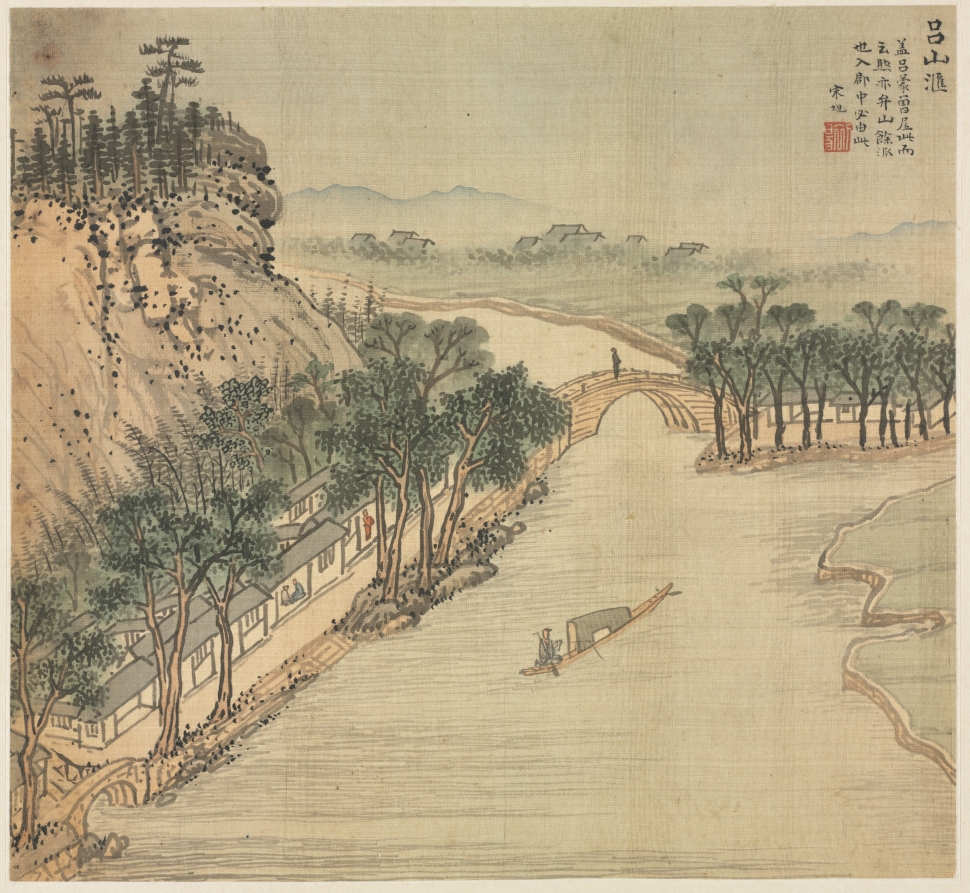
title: Lüshan Hui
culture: China, Jiaxing, Ming dynasty (1368–1644)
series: Eighteen Views of Huzhou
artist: Song Xu (Chinese, 1525-c. 1606)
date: c. 1588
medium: Album leaf; ink and color on silk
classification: Painting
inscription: 呂山滙：蓋呂蒙曾屋此而云然。亦弁山餘派也，入郡中必由此。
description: This album of landscape paintings depicts the famous scenic areas located in and around the city of Wuxing in southeastern China. These places were all known for their natural beauty, but in addition, a number were distinguished by their links to eminent historical figures and events. The artist, Song Xu, was not a native of Wuxing, but must have visited it when he accepted the commission, for he carefully depicted all eighteen views and wrote comments on each of them. Song's gazetteer-like notation on this leaf reads: Lüshan hui [Mount Lü corridor]: Its name stems from Lü Meng (178–219 CE), who camped here. It is a place in the Bian Mountain range. To get to the capital of (Wuxing) prefecture, one must follow through there.